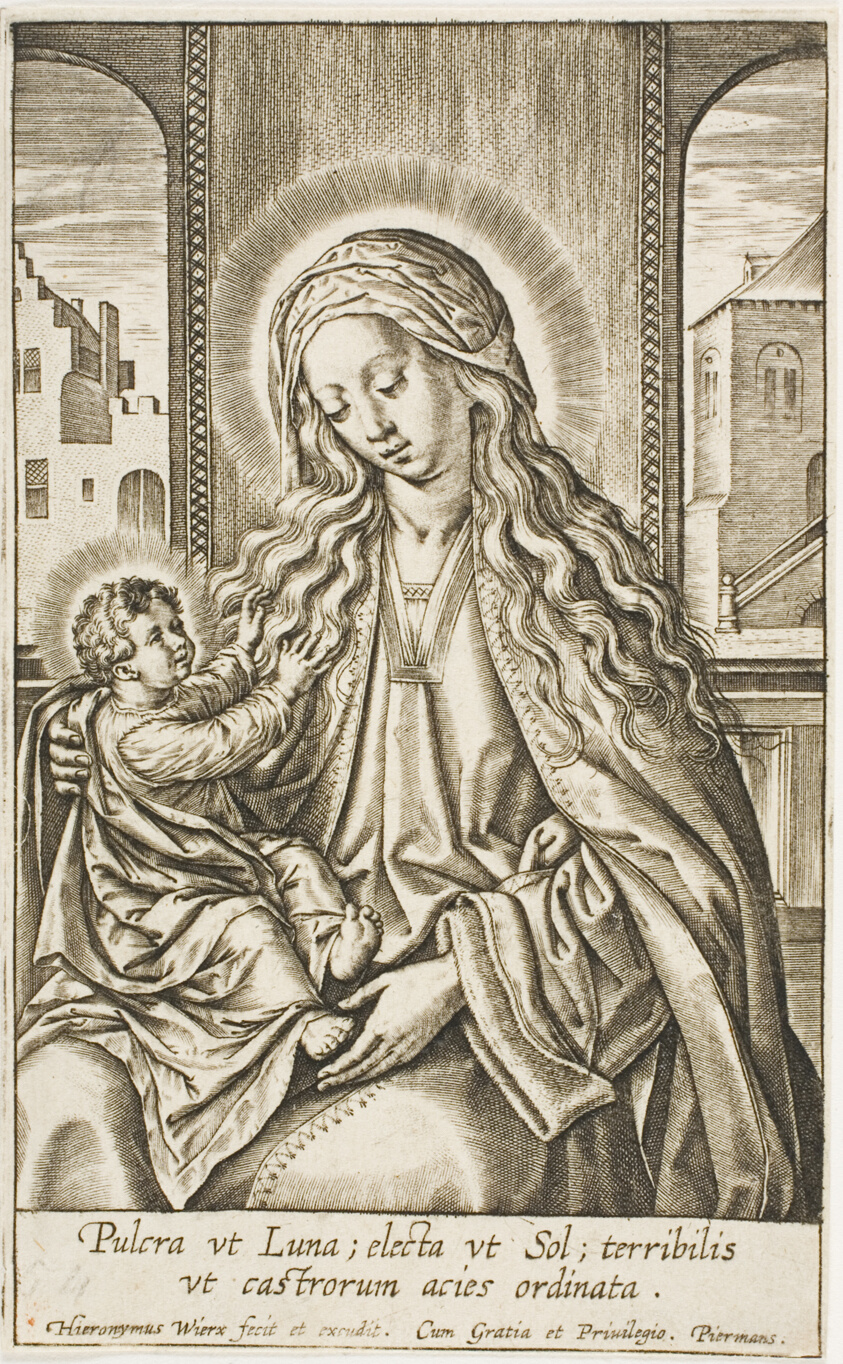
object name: Print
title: The Virgin and Child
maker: Jerome Wierix; Flemish, 1553-1619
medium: Engraving in black on ivory laid paper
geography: Flanders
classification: engraving; print; prints and drawing